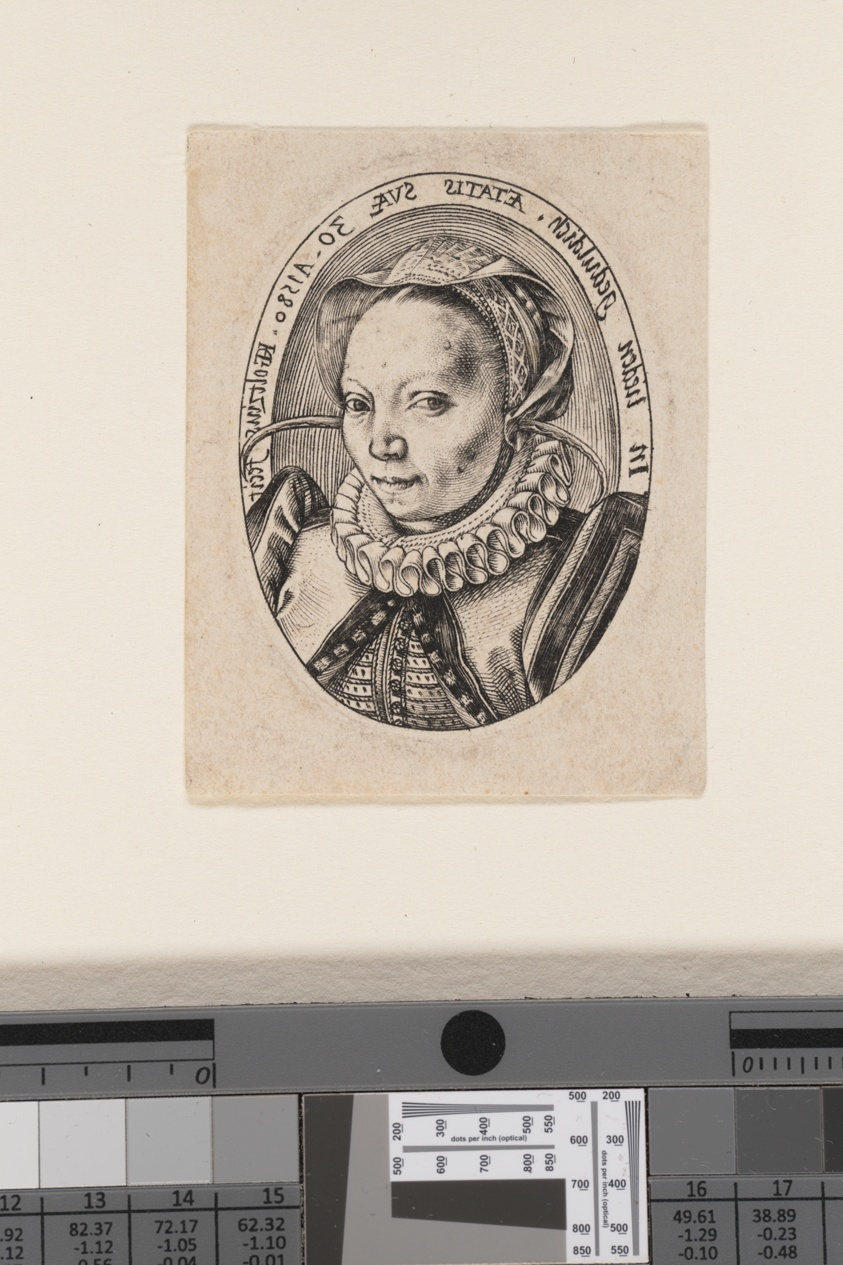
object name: Print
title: Grietgen Jansdochter, wife of the artist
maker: Hendrick Goltzius (Dutch, 1558–1617)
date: 1580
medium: Engraving on paper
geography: Netherlands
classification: engraving; paper; print; prints and drawing